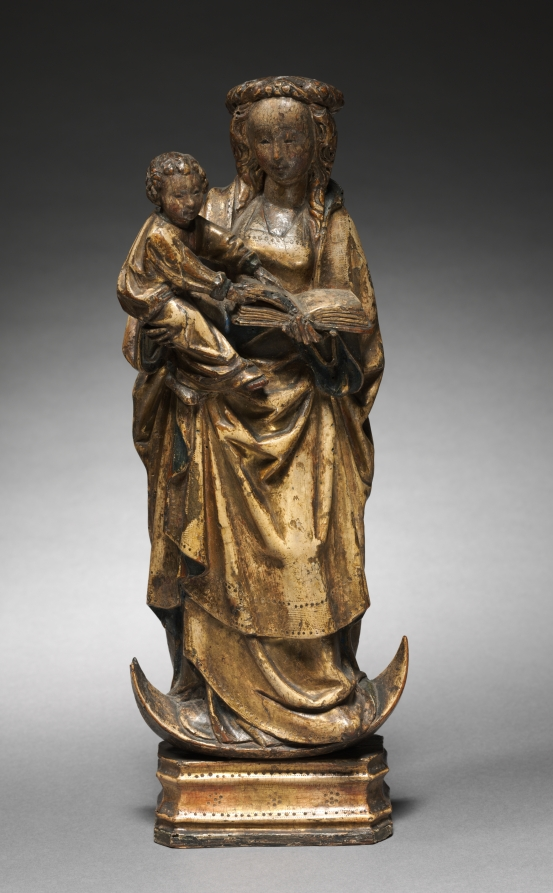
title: Virgin and Child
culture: South Netherlands, Malines, 16th century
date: c. 1510–1515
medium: painted and gilded walnut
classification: Sculpture